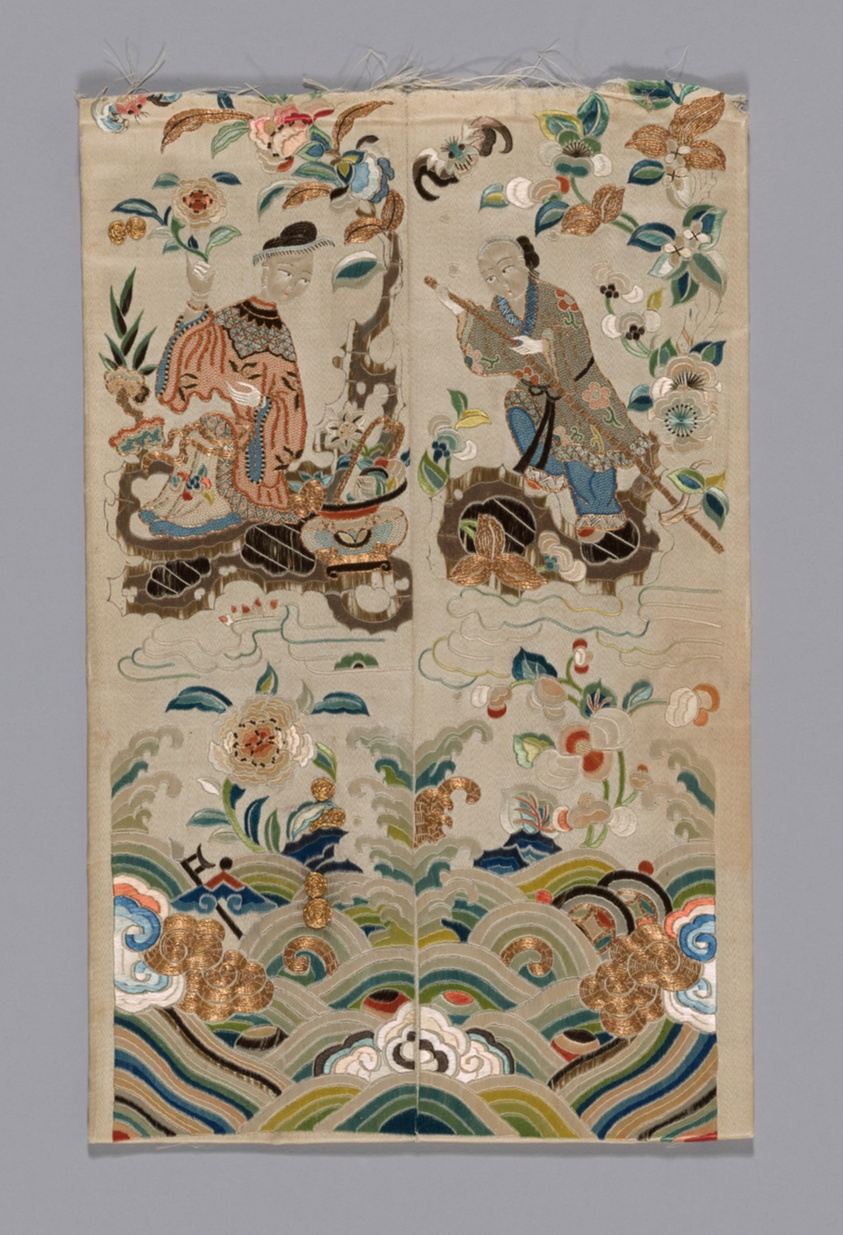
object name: Costume and Accessories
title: Sleeve band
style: han (chinese), qing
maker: Han-Chinese (China)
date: Qing dynasty (1644–1911), 19th century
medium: Couched and embroidered sleeve-bands from a robe, cut and framed as a three-panel folding desk screen. Two lower halves joined to form central frame, top halves form panels at either side. Figures and auspicious symbols in colors and gold on ivory silk grou nd.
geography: China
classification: textile; needlework (visual works); costume - needlework; costume